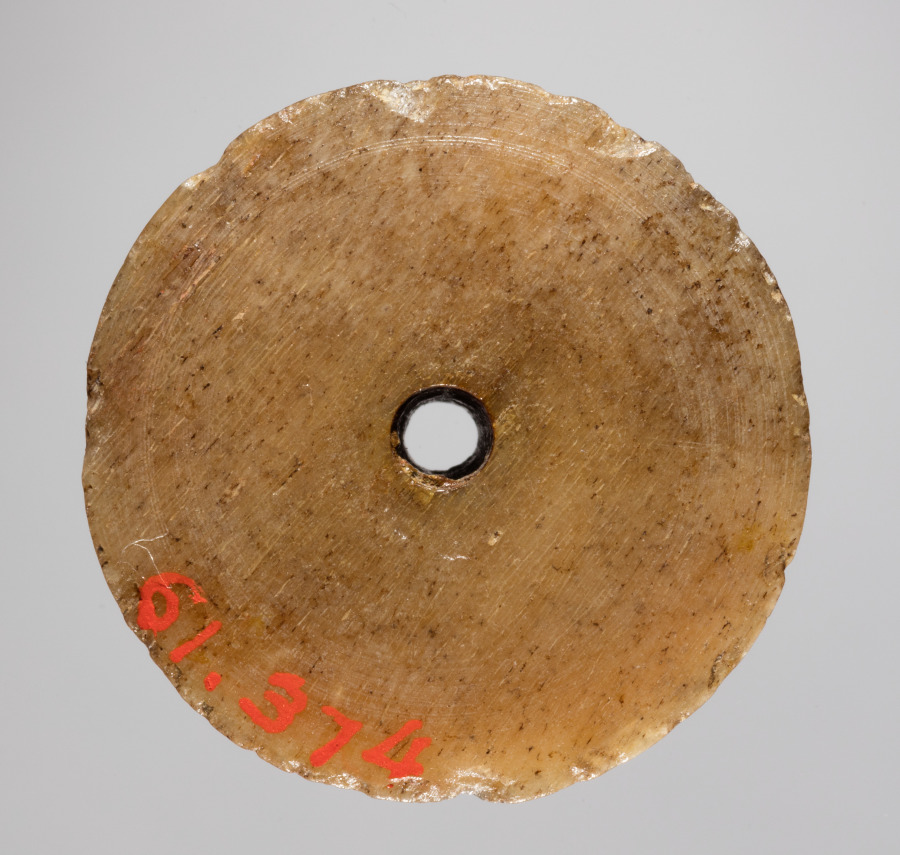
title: Spindle Whorl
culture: Iran, early Islamic period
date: 700s - 900s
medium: bone, incised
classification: Spindle Whorl